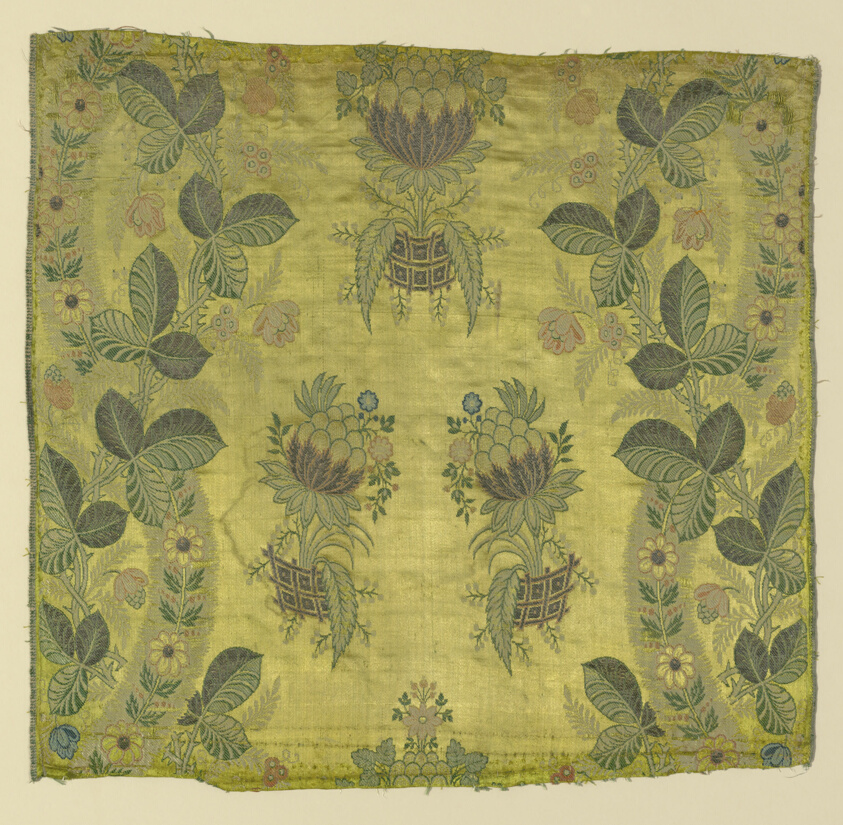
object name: Textile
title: Fragment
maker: England or France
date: c. 1720/24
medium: Silk, silvered-metal-strip-wrapped silk, warp-float faced 7:1 satin weave with supplementary brocading wefts and self-patterned by ground wefts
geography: England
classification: textile; weaving